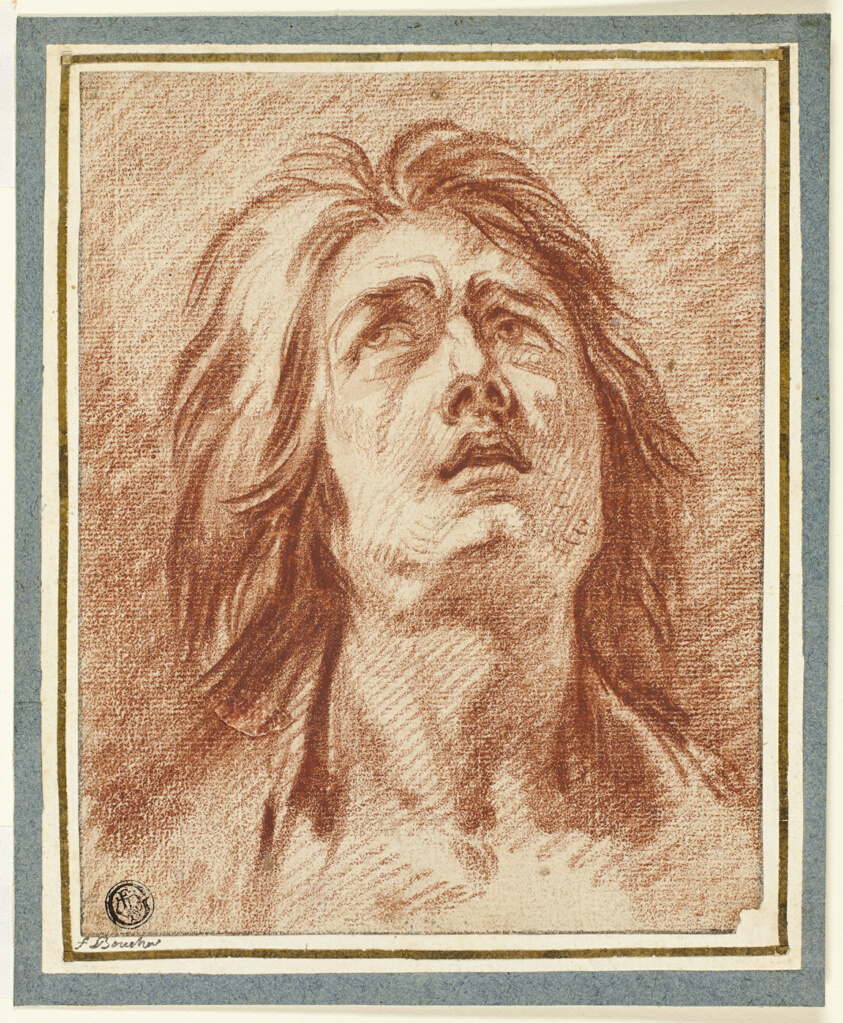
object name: Drawing and Watercolor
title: Distress: Head of a Woman Looking Upwards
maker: Possibly or school of Jean-Baptiste Greuze; French, 1725-1805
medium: Red chalk on cream laid paper, laid down on ivory laid paper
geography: France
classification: chalk; drawings (visual works); prints and drawing